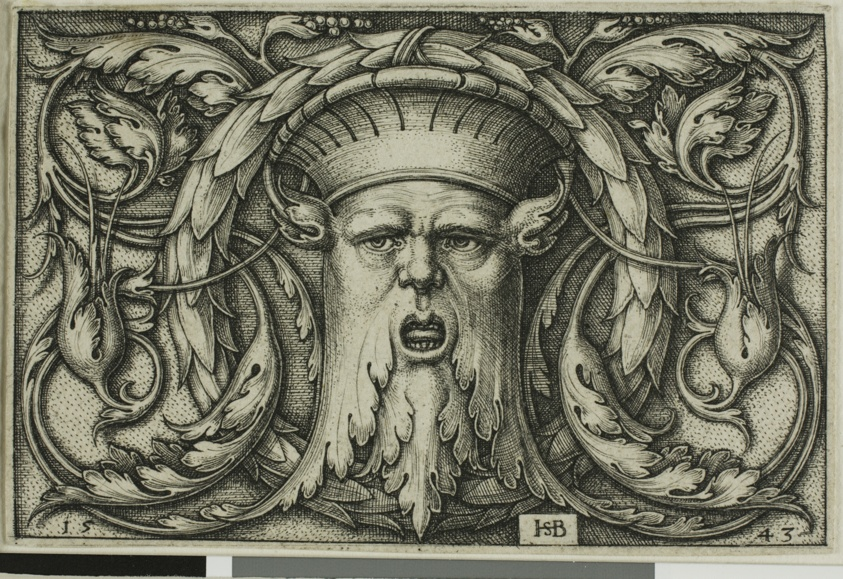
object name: Print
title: Ornament with a Mask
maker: Sebald Beham; German, 1500-1550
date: 1543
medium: Engraving in black on ivory laid paper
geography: Germany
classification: engraving; print; prints and drawing